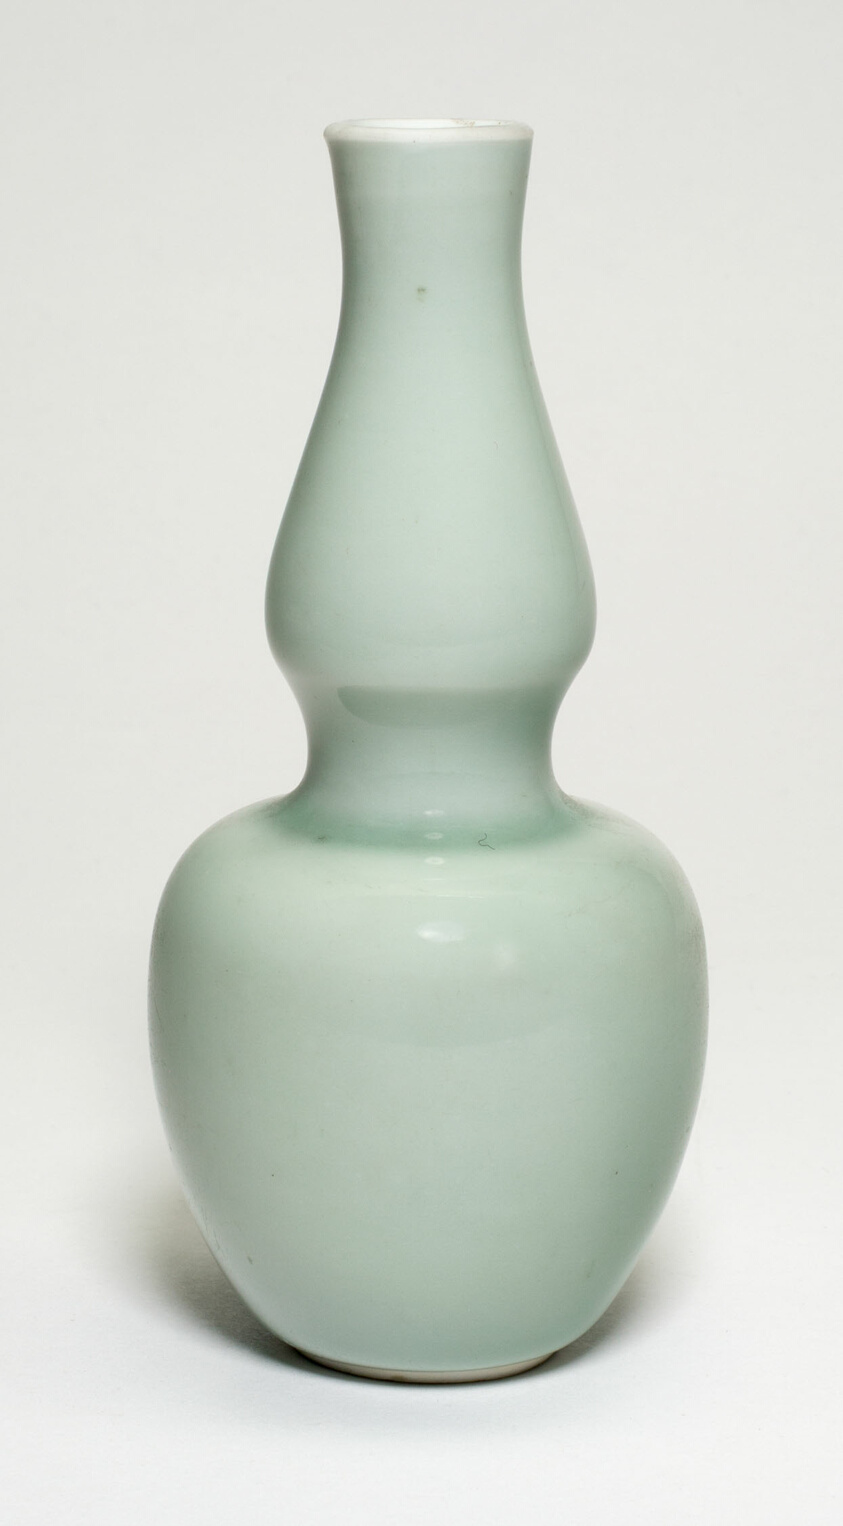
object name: Vessel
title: Celadon-Glazed Double-Gourd Vase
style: Chinese (culture or style)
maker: China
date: Qing dynasty (1644–1911), 18th/19th century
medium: Celadon-glazed porcelain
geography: China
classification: vase; porcelain; vessel; asian art; ceramics